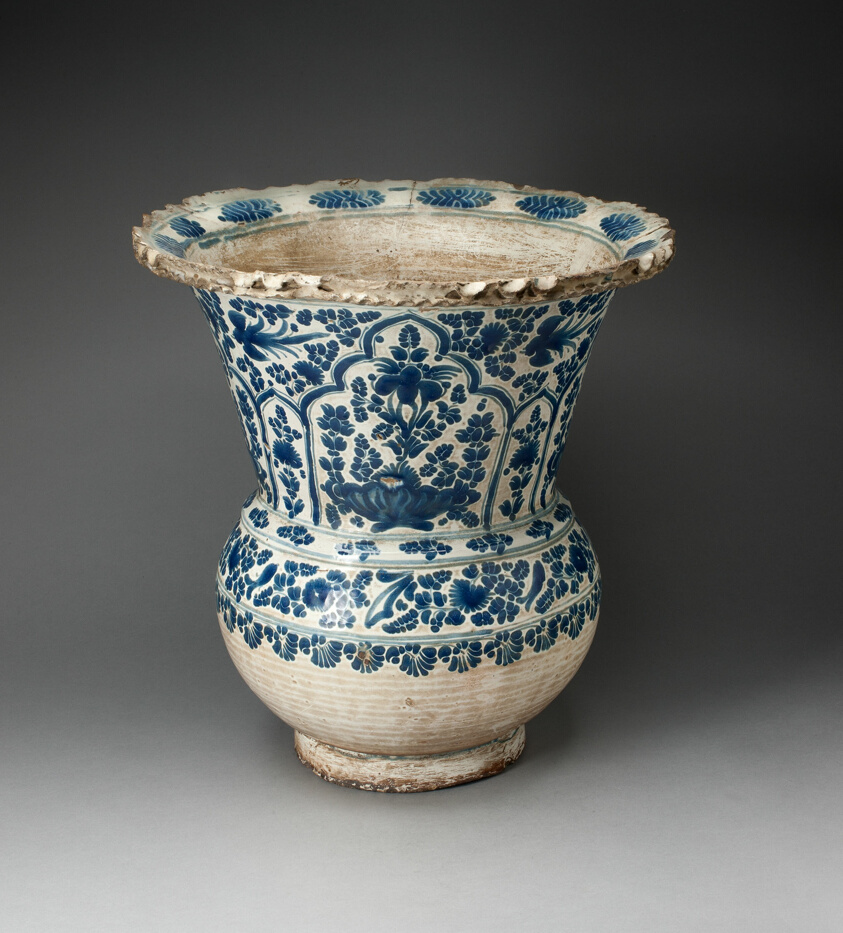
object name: Vessel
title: Jardinière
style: spanish colonial, european, Arts of the Americas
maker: Talavera poblana; Puebla, Mexico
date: 1700–75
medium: Tin-glazed earthenware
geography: Puebla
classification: earthenware; european decorative arts; ceramics; vessel; art of the americas